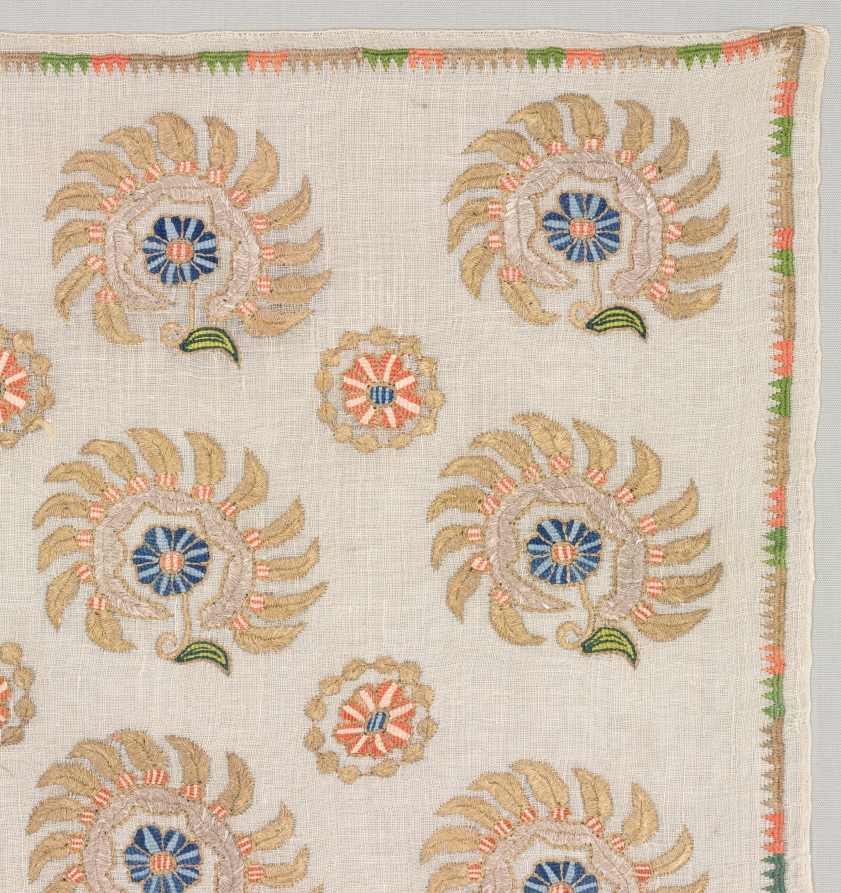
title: Embroidered Square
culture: Turkey, 19th century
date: 19th century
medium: embroidery: silk, gold and silver filé on linen tabby ground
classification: Embroidery